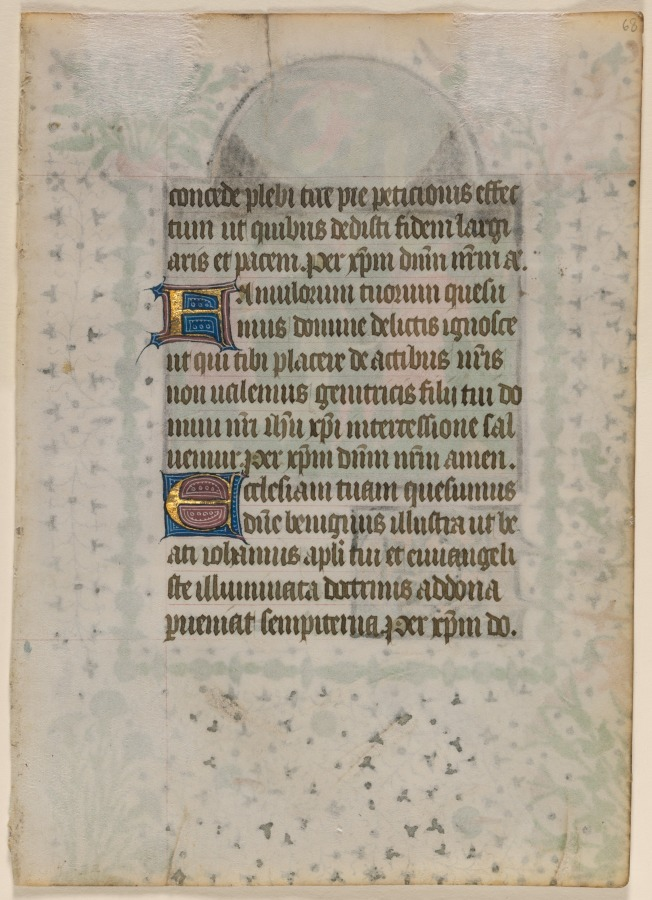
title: Leaf from a Book of Hours: Text (verso)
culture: France, Paris (?), 15th century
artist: Boethius Illuminator (Flemish, active c. 1414–20)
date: c. 1410–20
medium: ink, tempera and gold on vellum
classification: Manuscript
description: This finely preserved leaf with its large miniature is stylistically consistent with the work of the Boethius Illuminator. An unusual and very original painter, he was named after a manuscript copy of the works of the Roman philosopher Boethius (AD 480-524), which he illuminated in 1414. The artist favored bright, sweeping colors and expressionistic compositions. He used tessellated (mosaic-patterned) grounds in his miniatures, as is the case here. The Boethius Illuminator and his assistants participated in the illustration of over a dozen manuscripts between 1414 and 1418/20. It was not unusual for artists working in different styles to collaborate on a single book of hours during the 1400s and 1500s.